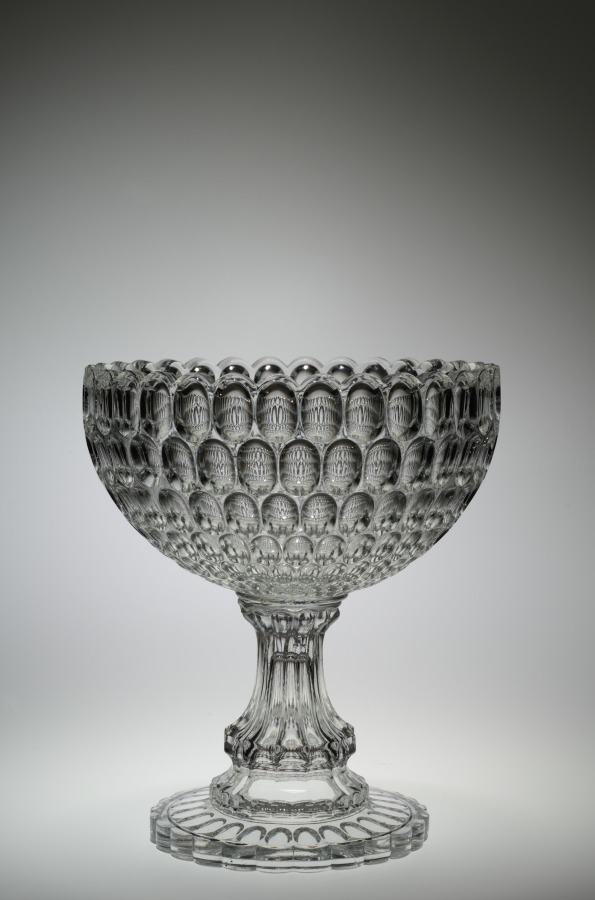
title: Argus Compote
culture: America, Pennsylvania, Pittsburgh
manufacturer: Bakewell, Pears and Company (American)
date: c. 1865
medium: glass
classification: Glass